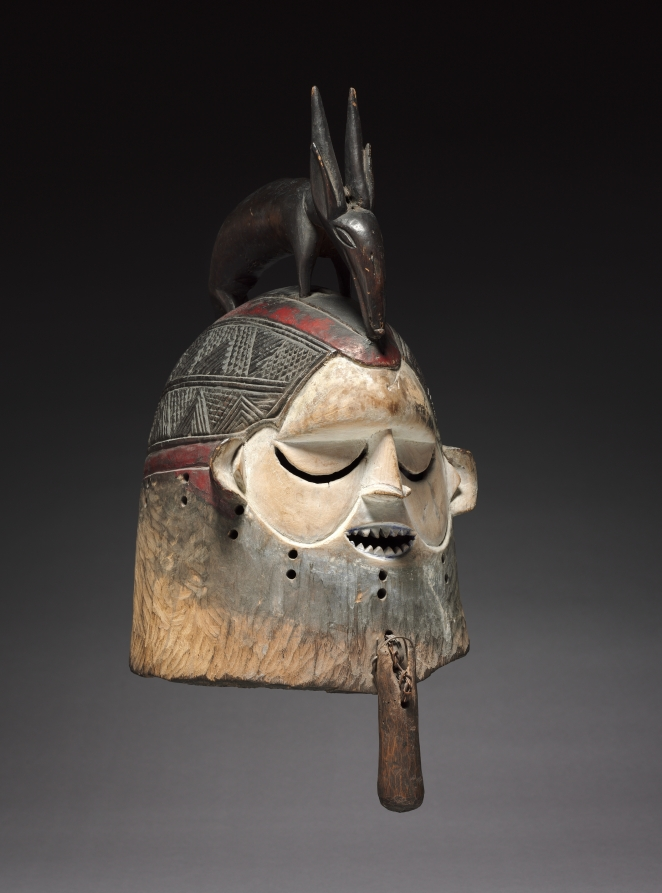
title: Mask (hemba)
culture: Africa, Central Africa, Democratic Republic of Congo, Suku-style carver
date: late 1800s–early 1900s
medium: Wood, reed, paint, and metal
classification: Mask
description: Suku helmet masks are often used in initiation ceremonies for young men in the society. Helmet masks such as this represent images of deceased elders in the society. They are to ensure successful hunting, help cure illnesses, and protect its wearer from evil. The animal shaped like a gazelle or antelope is typically associated with folktales, proverbs, and personal hunting exploits.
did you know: Suku helmet masks are often used in initiation ceremonies for young men in the society.